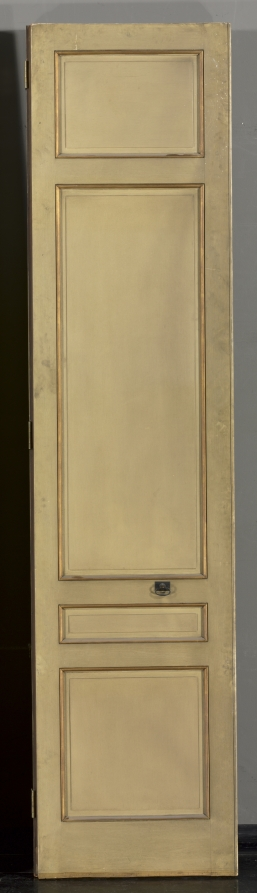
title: Double-leaf Doors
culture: France, 18th century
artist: Pierre Rousseau (French, 1751–1829)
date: 1790s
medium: oil on wood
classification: Painting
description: Shifts in style and taste often result in changes to original architectural details. Rousseau painted these doors with imitation dark wood grain. Another craftsman later scraped off the dark color surrounding the classical designs. This set was conserved in 1979 and retains more traces of the original graining than the other doors by this artist in the museum's collection.